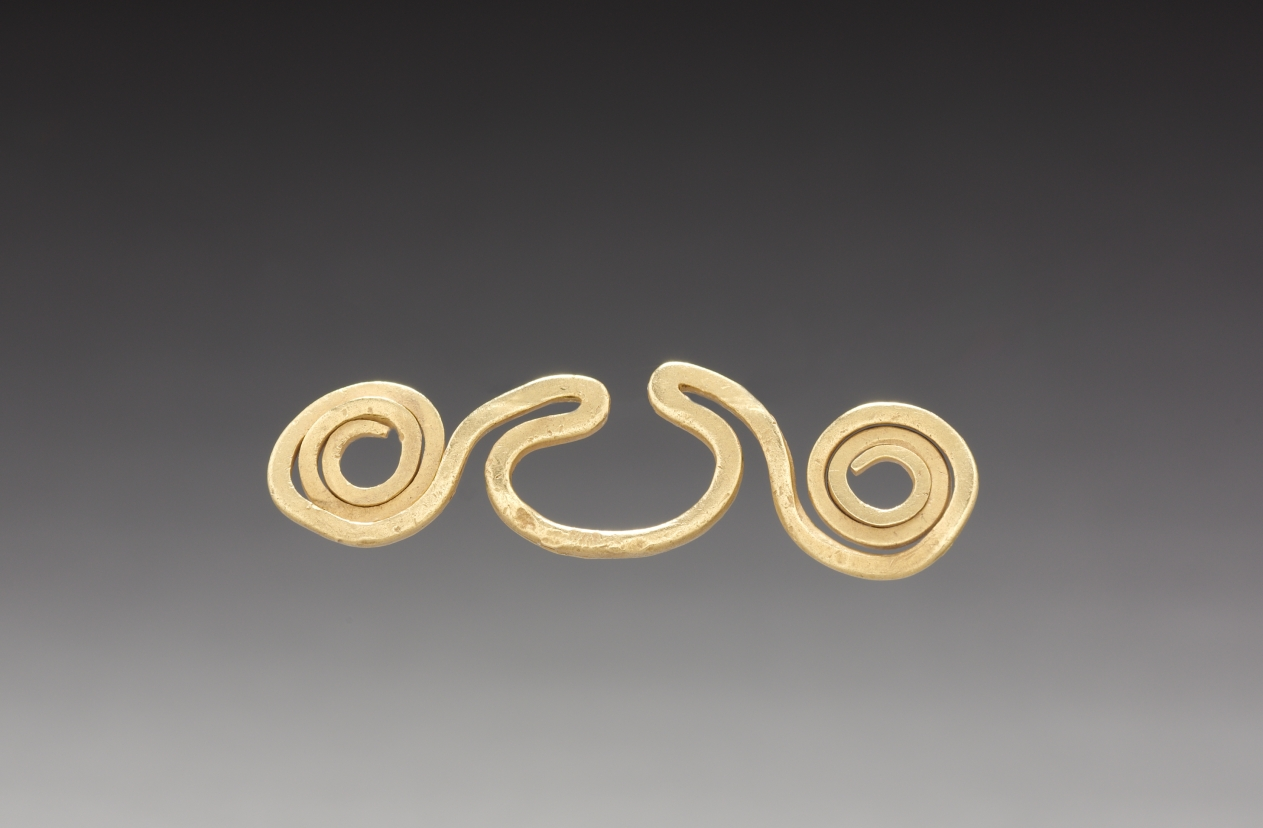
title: Nose Plug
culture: Ecuador, Esmeraldas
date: 200–1000 CE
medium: gold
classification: Metalwork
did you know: Working with gold dates back to at least 500 BC in Ecuador and Colombia.